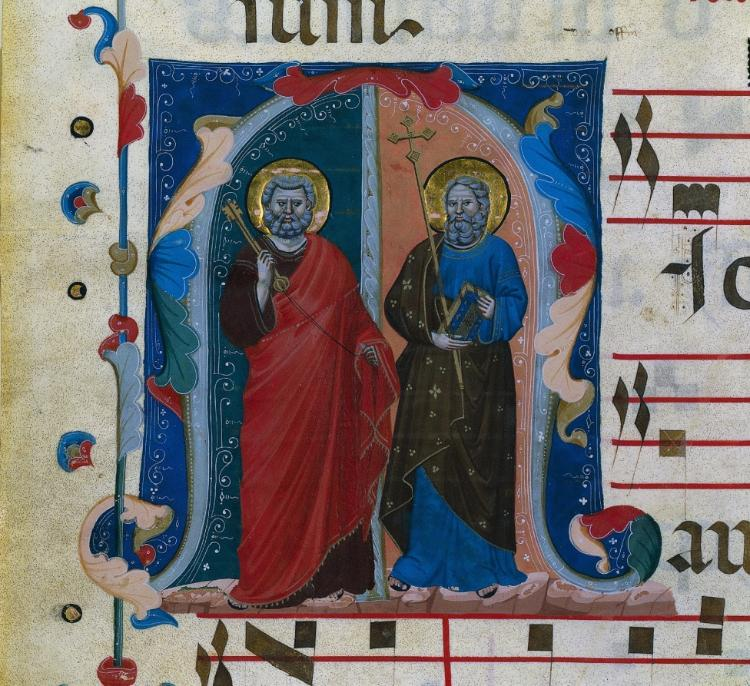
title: Leaf from a Gradual with Historiated Initial (M): Saints Peter and Andrew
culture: Italy, Bologna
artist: Master of Isaac and Esau (Italian)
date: c. 1320–40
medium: ink, tempera, and gold on parchment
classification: Manuscript